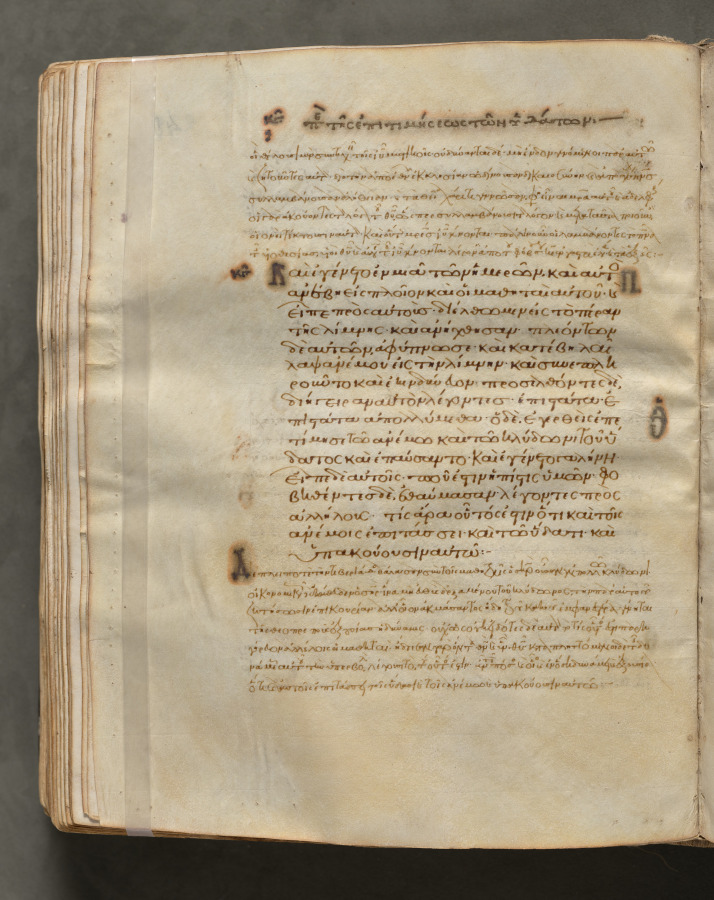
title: Text, folio 240 (verso), from a Gospel Book with Commentaries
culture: Byzantium, Constantinople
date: c. 1000–1100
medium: ink, tempera, and gold on vellum; leather binding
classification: Bound Volume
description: Each of the four gospels in this book opens on a page with brilliantly illuminated borders depicting the author of the text as well as birds—principally peacocks, symbols of the immortality of the soul—and fountains, representing the fountain of life and the salvation of the soul. This volume consists of 428 leaves with texts in Greek. Its level of sophistication suggests that it was probably written and decorated in a monastery in Constantinople.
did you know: Gospel books were carried in procession through Byzantine churches.